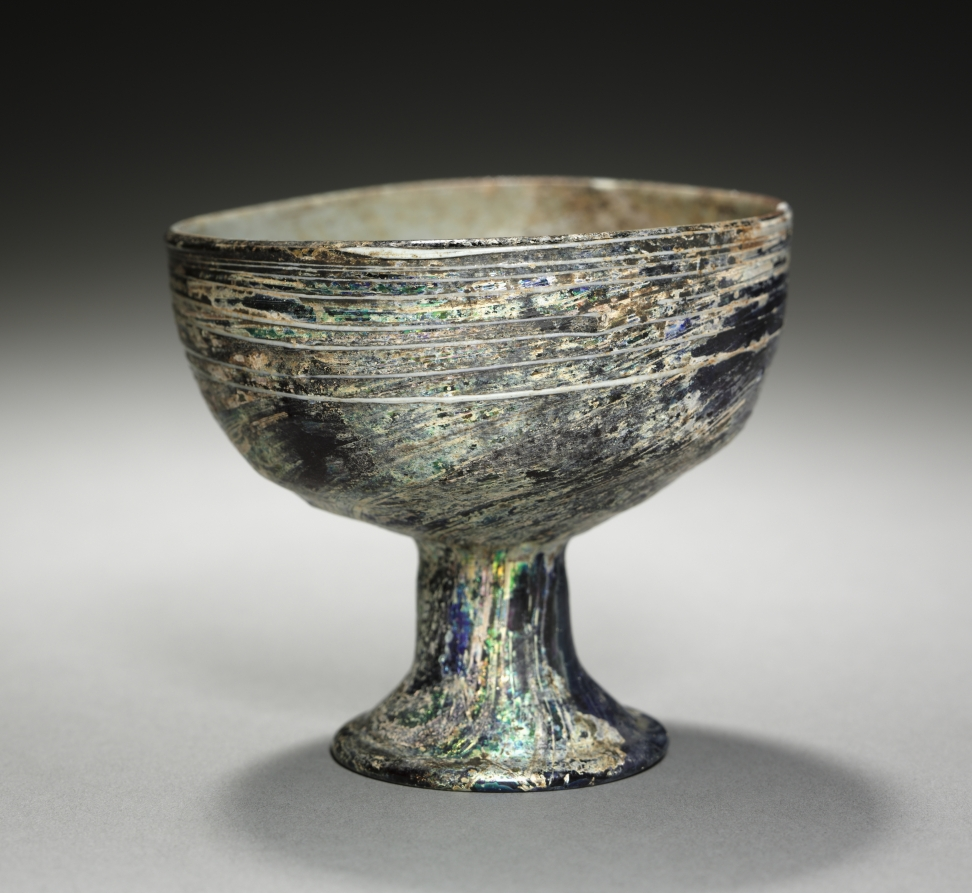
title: Chalice (?)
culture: Italy, Roman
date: 100–300 CE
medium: glass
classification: Glass